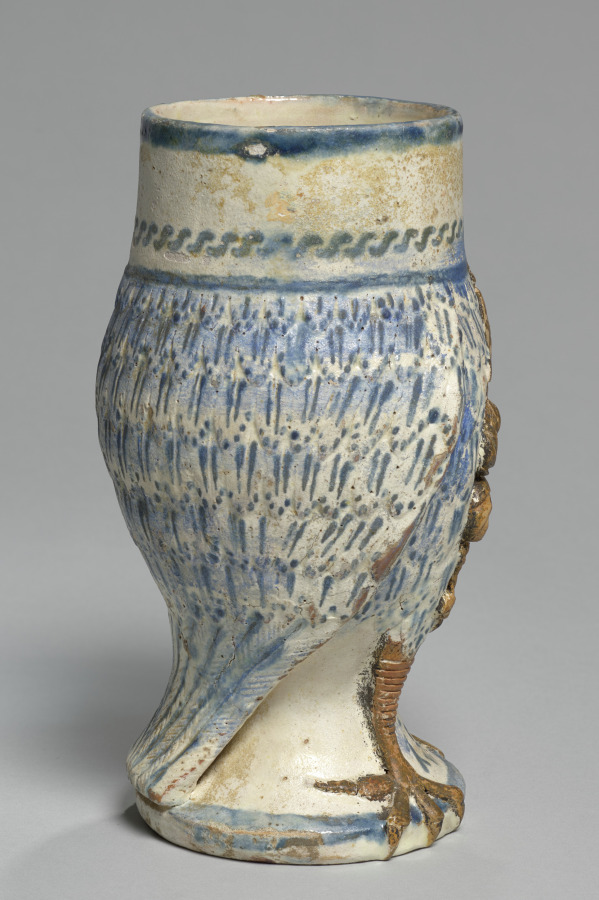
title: Owl (body)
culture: Southern Germany, 16th century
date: 1540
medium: faience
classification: Ceramic